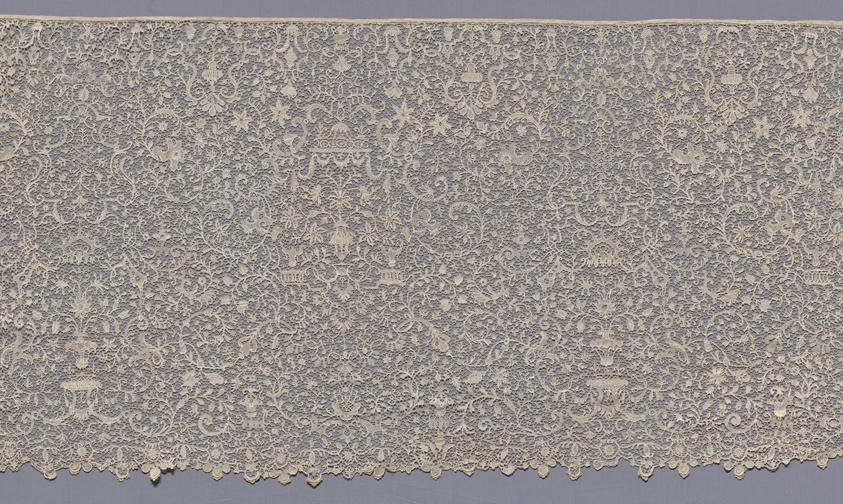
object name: Textile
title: Flounce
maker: France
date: c. 1700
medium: Linen, needle lace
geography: France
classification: textile; lace - needle